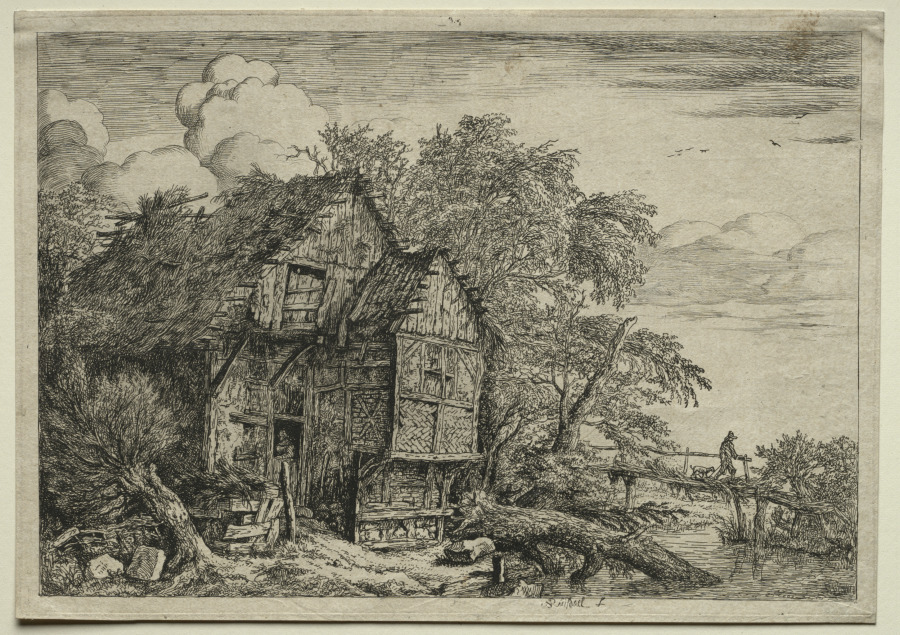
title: The Little Bridge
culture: Netherlands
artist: Jacob van Ruisdael (Dutch, 1628/29–1682)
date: c. 1650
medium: etching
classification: Print